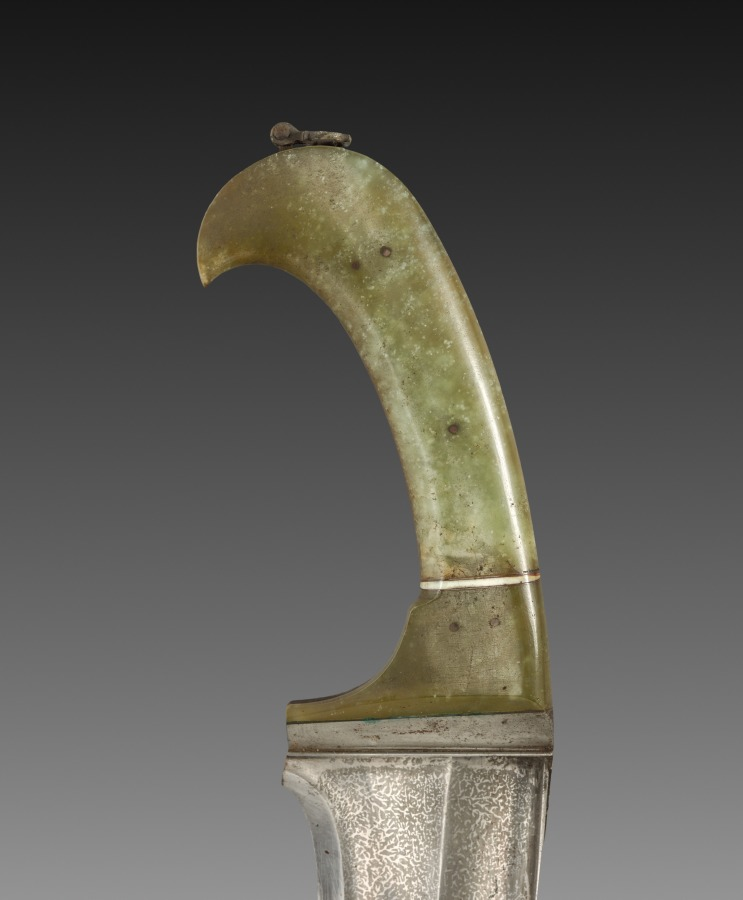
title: Knife with Jade Handle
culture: East India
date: c. 1750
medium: steel and jade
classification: Arms and Armor